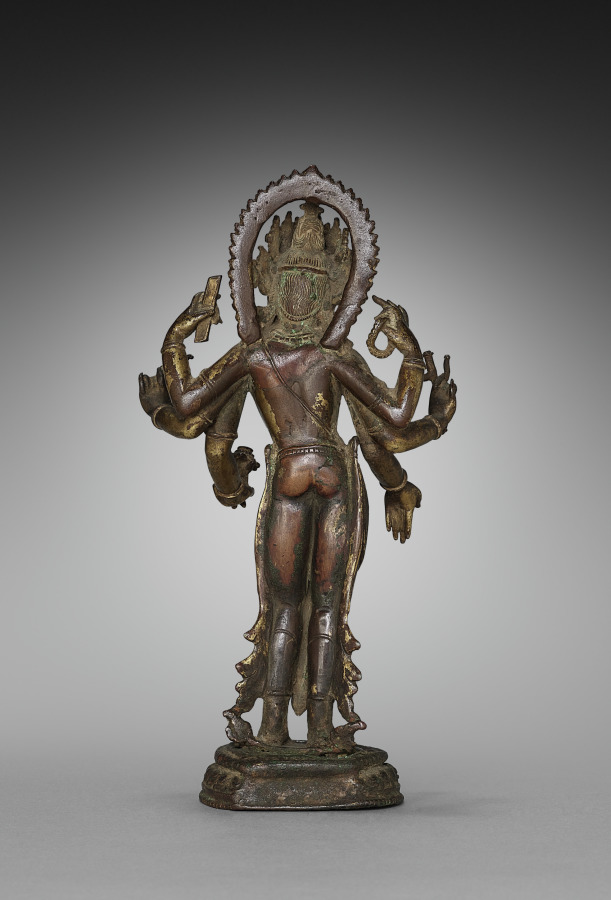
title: Lokeshvara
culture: Nepal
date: 1300s–1400s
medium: gilded copper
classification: Sculpture